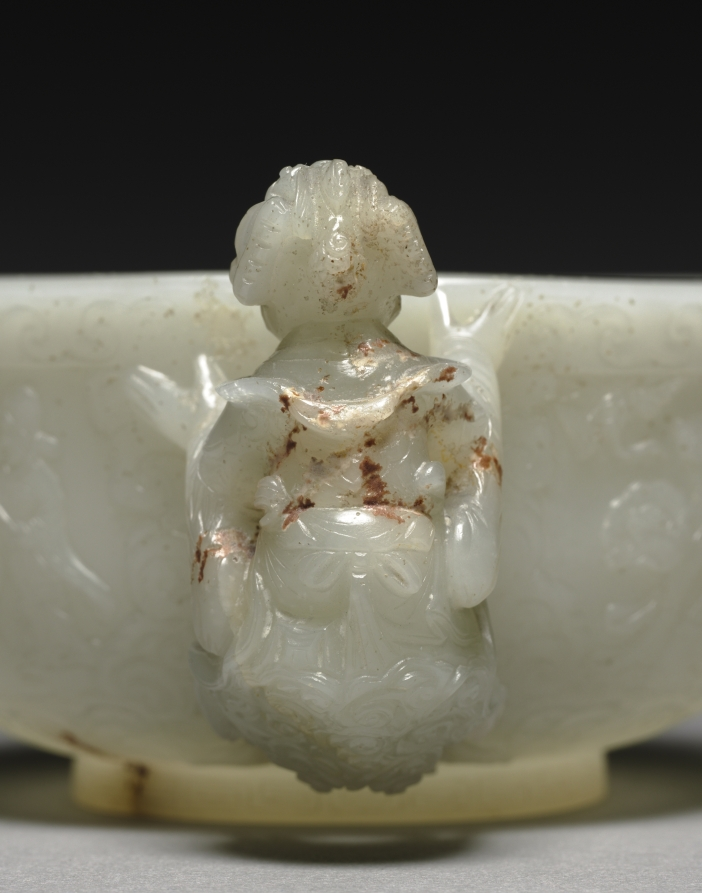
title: Cup with Daoist Figures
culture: China, Qing dynasty (1644–1911), Qianlong period (1736–95)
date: 1736–95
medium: Pale greenish-white jade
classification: Jade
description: During the Qing dynasty, Suzhou’s best products were sent north to the capital. Those that met imperial approval were sometimes graced with Qianlong’s mark, added by calligraphers and jade workers at court. The lack of a Qianlong mark on the Cleveland cup suggests that it might not have reached the court. Previously dated to the Yuan dynasty (1271–1368), new scholarship dates this cup to the Qing period.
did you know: Two female immortals serve as handles, while a Daoist procession with immortals, musicians, and attendants winds around the body of the cup.